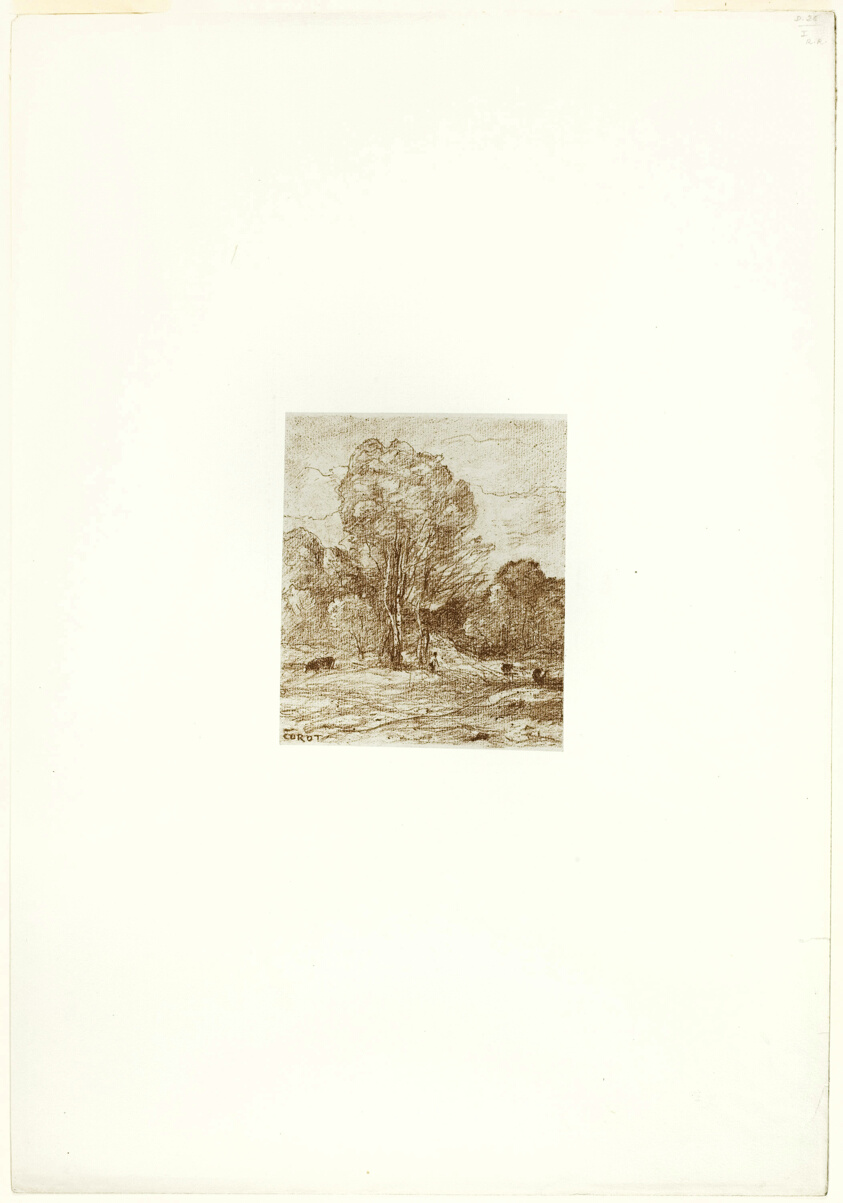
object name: Print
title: The Cow Pasture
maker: Jean-Baptiste-Camille Corot; French, 1796-1875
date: 1871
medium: Transfer lithograph printed in brown on light gray China paper laid down on white wove paper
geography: France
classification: lithograph; print; prints and drawing